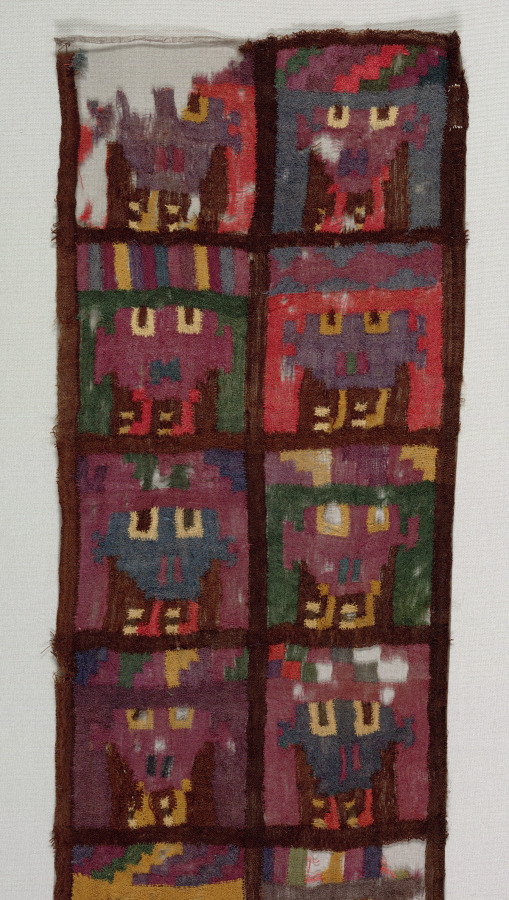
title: Band with Trophy Heads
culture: Peru, South Coast, Nasca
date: 100 BCE–700 CE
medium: interlocking warp and weft, single interlock: wool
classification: Textile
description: This band, remarkable for its intense color and spider-web sheerness, was created using an unusual technique known as discontinuous warp and weft. That is, none of the vertical or horizontal yarns are continuous from one side of the band to the other. Rather, they travel back and forth within their own color areas, linking at the edges with yarns in adjacent areas. This is a difficult feat when weaving on a loom and the creator likely used another approach, such as darning with a needle over a ground cloth that was then removed. The image repeated in each of the band’s rectangles is a head supported on two little feet.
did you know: This band is made in with a weaving technique that is unique to the ancient Andes.